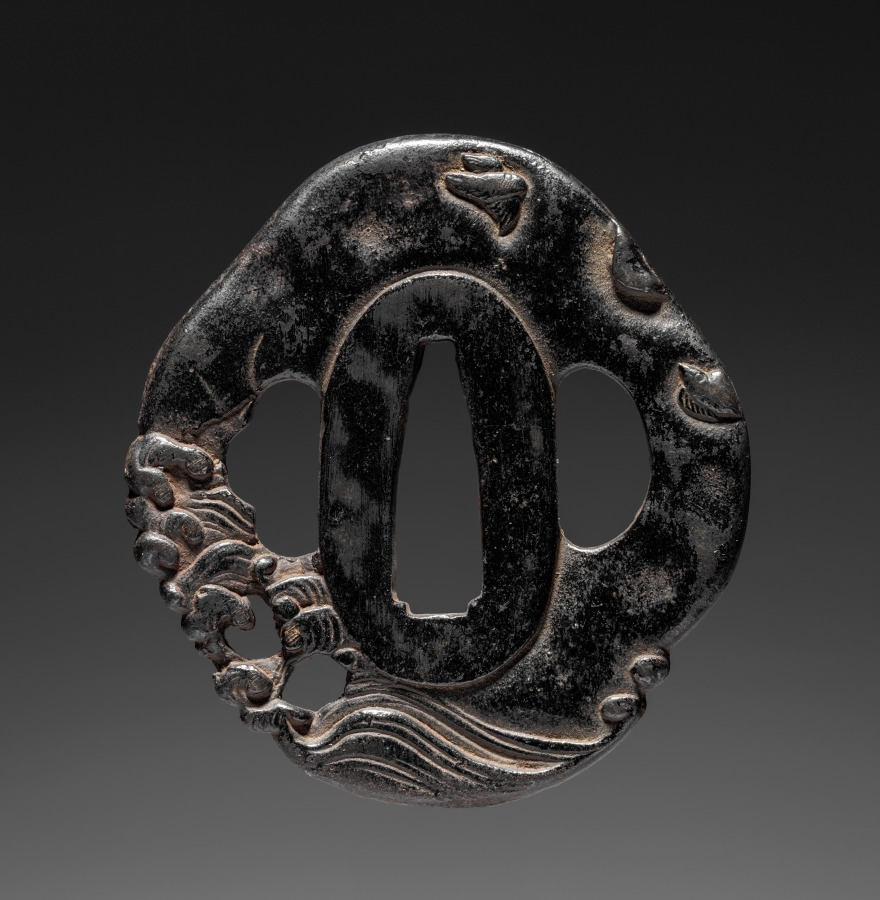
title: Sword Guard (Tsuba) with Plovers in Waves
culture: Japan, possibly Edo period (1615-1868)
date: c. 1615–1868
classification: Arms and Armor